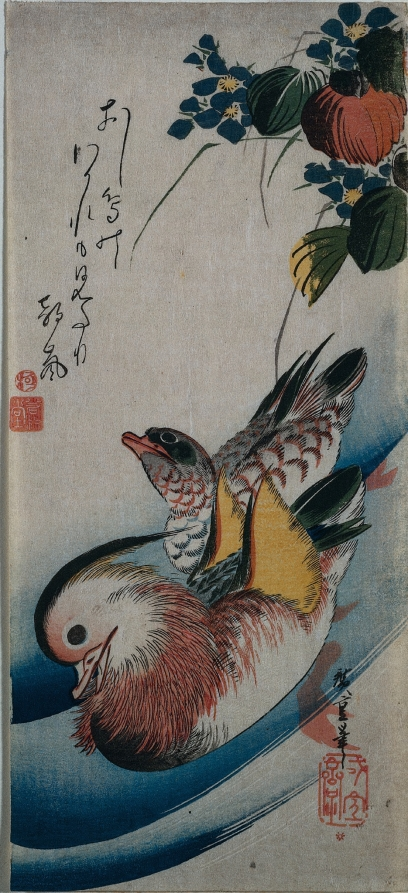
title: Mandarin Ducks and Flowering Plants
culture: Japan, Edo period (1615–1868)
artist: Utagawa Hiroshige (Japanese, 1797–1858)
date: early or mid-1830s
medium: color woodblock print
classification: Print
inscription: Signature: Hiroshige hitsu. Artist Seal: Ichiryusai. Publisher: Wakasaya Yoichi (Jakurindo). Censorship Seal: kiwame.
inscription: Collector's seal: Vever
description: In Asian painting, ducks are usually shown in pairs because a male and female mate for life. They symbolize fidelity and tranquility. The presence of another duck is suggested here by the gesture of the bird's head. Notice the variety of brushstrokes and ink tones used to depict the duck's plumage. The bird and flower genre is a popular theme in the paintings and prints of the Kelvin Smith Collection. Kachoga, or bird and flower pictures, became popular among collectors in Japan during the 19th century, due in large part to Hiroshige. Although better known for his landscape prints, Hiroshige made several exceptional prints of birds, plants, and animals that reveal his keen observation of nature.